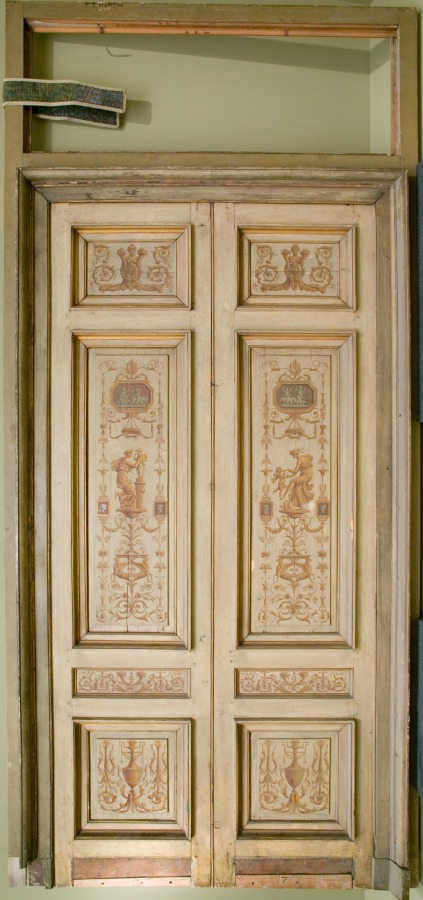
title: Double-Leaf Doors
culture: France, 18th century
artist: Pierre Rousseau (French, 1751–1829)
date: 1790s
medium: oil on wood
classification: Painting